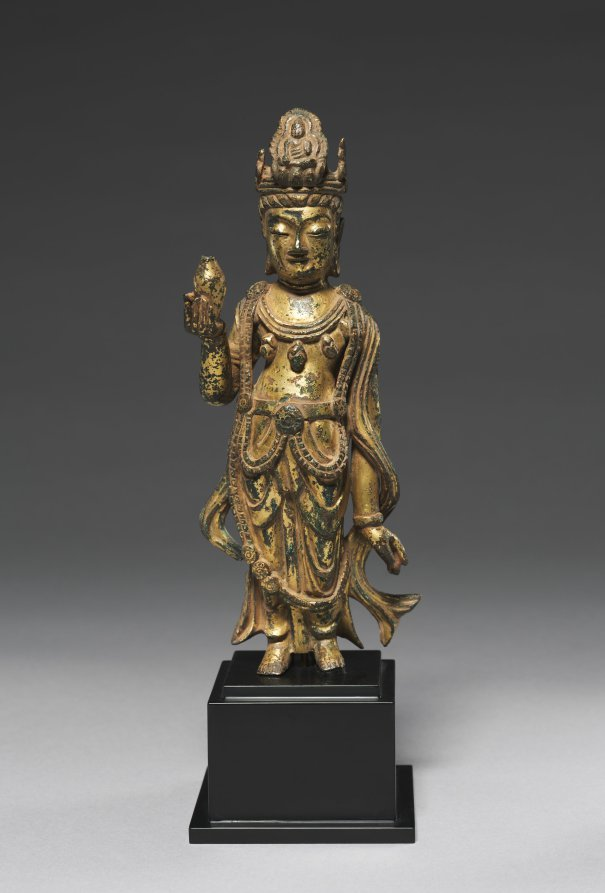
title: Standing Avalokitesvara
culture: Korea, Unified Silla period (668-935)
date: 700s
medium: Gilt-bronze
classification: Sculpture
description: This small gilt-bronze statue represents the Bodhisattva of Compassion (관음보살 in Korean), an enlightened being who helps devotees on their path. It features two prominent attributes: a water sprinkler (kundika in Sanskrit) and a miniature image of Buddha Amitābha in its jeweled crown. Its sweet and gentle smile accentuates this celestial being’s immeasurable compassion for human suffering.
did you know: Created during the Unified Silla period, a high point of the spread of Buddhist teachings, this kind of miniature gilt-bronze statue was often used as a portable object of devotion by traveling Buddhist monks.